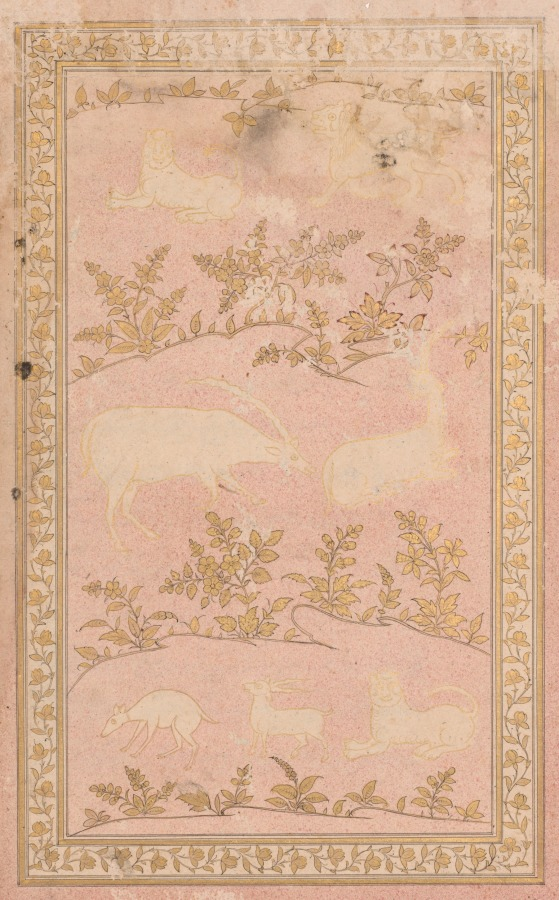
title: Stenciled Scenes of Lion and Gazelle (verso)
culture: Mughal India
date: c. 1710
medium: Ink and gold on paper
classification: Painting